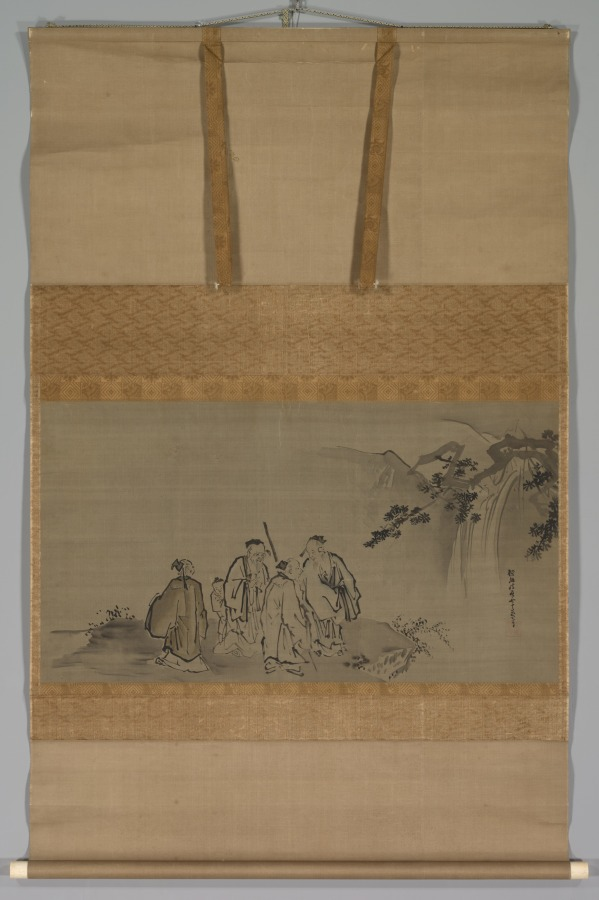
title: Chinese Sages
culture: Japan, Edo period (1615–1868)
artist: attributed to Kano Tan’yū (Japanese, 1602–1674)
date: mid- to late 1600s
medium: hanging scroll; ink and color on silk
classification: Painting